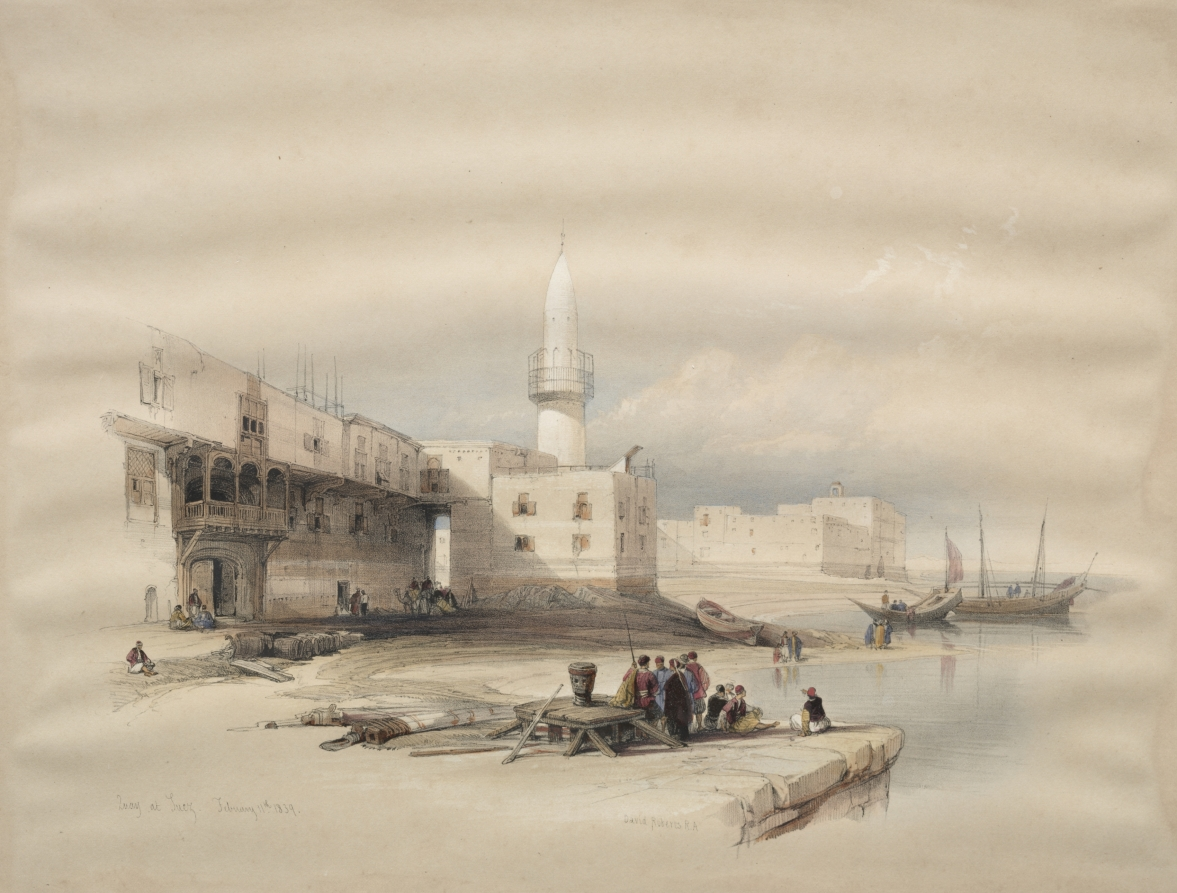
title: Quay at Suez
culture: England, 19th century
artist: David Roberts (Scottish, 1796–1864)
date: 1839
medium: color lithograph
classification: Print